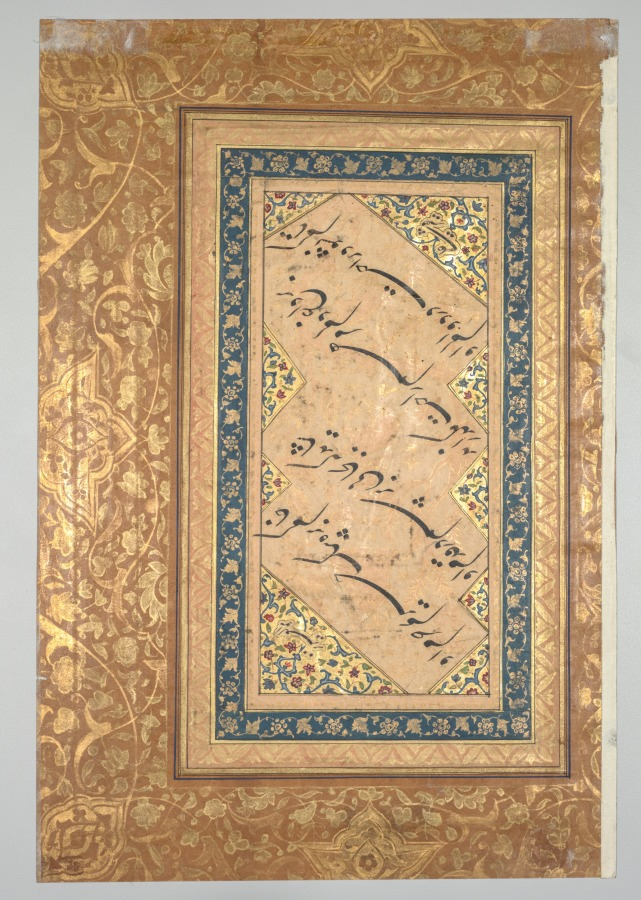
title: Calligraphy from a Ghazal of Badr al-Din Hilali Jaghata’i (Persian, active c. 1500)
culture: Iran, Safavid period (1501–1722)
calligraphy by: Faqir Ali (Persian, active c. 1550–1610)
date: c. 1550; borders added c. 1700s and mounted upside down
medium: ink on paper (verso)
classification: Calligraphy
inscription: Calligraphy, Persian verses in nasta‘liq script: He is Venerable!/ I am the dust on the path of the messenger to my beloved’s hallowed sanctuary;/ Perchance I may reach the destination in his footsteps./ On the burn in my branded heart, do not place any soothing balm,/ So that the comfort that I draw from my pain and sorrow for my beloved does not abate.